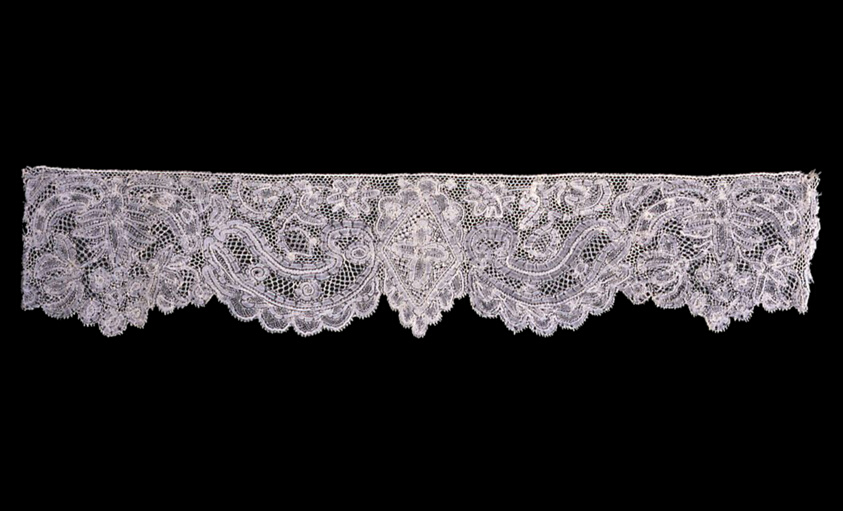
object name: Costume and Accessories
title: Border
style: 18th Century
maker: Belgium, Flanders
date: 1720/40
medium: Linen, bobbin part lace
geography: Flanders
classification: lace - bobbin; costume; costume accessory; costume - lace; lace; textile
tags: diamond shapes, cartouches, arabesque